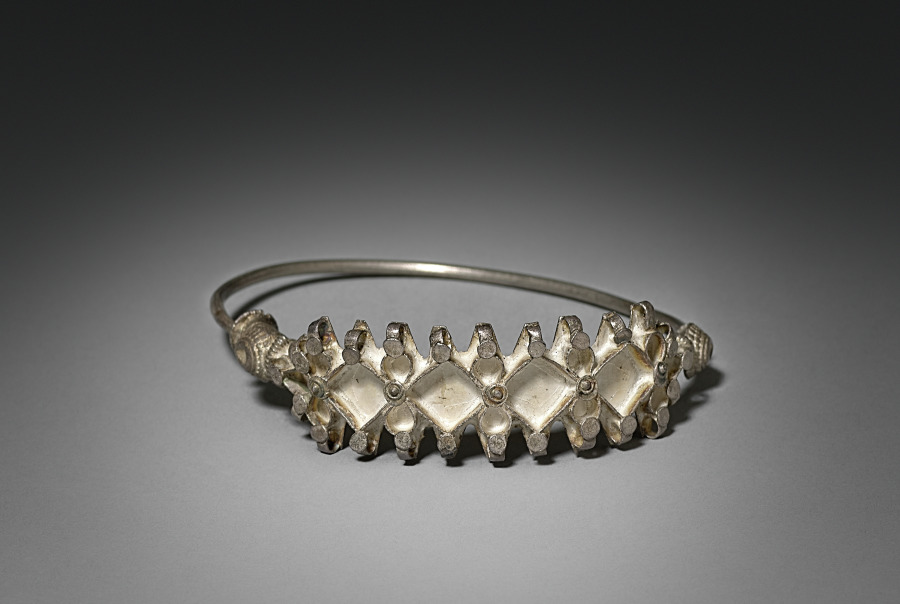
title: Nose Ring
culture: India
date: early 1900s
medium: silver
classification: Jewelry